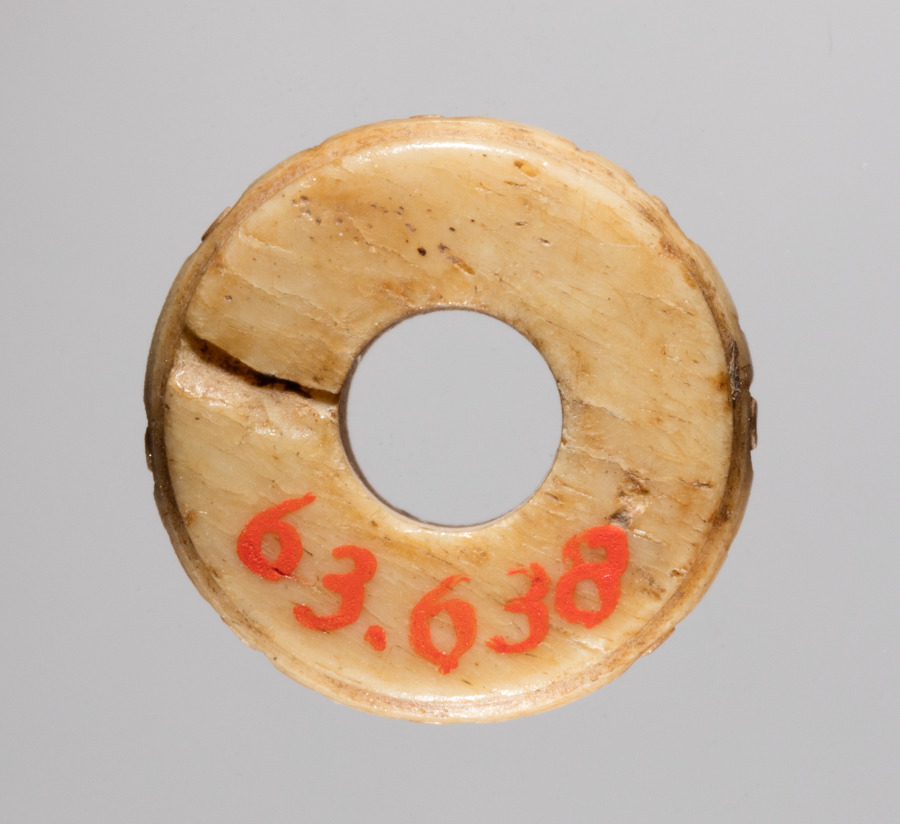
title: Spindle Whorl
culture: Iran, early Islamic period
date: 700s - 900s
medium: bone, incised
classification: Spindle Whorl